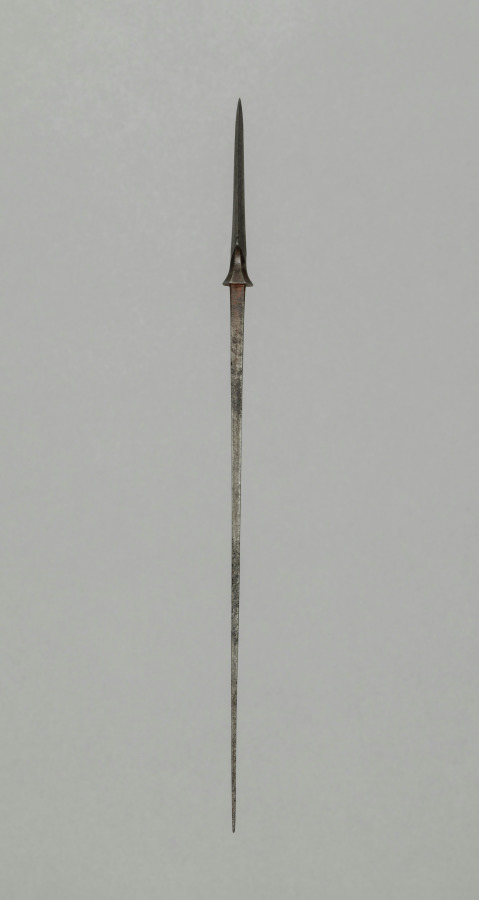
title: Arrow Point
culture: Japan, Edo period (1615–1868)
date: 1700s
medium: steel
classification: Arms and Armor